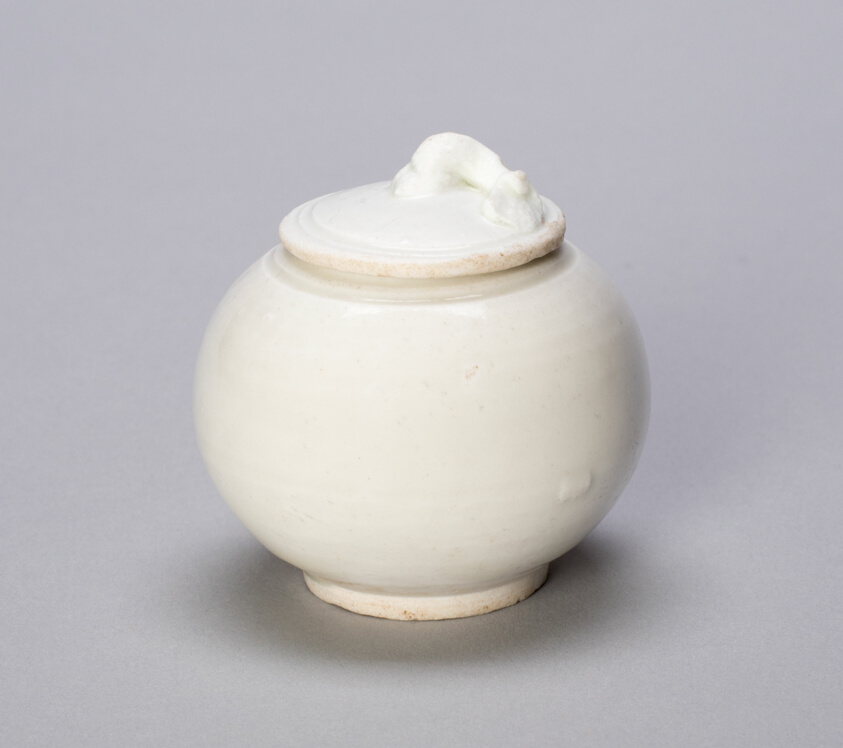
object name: Vessel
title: Covered Globular Jar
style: Chinese (culture or style)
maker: China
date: Song dynasty (960–1279)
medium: Ding-type ware; glazed porcelain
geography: China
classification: ceramics; vessel